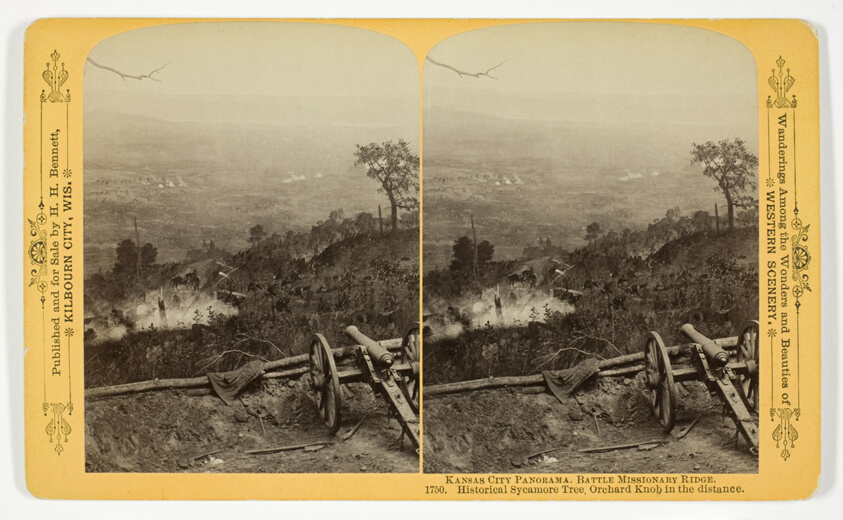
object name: Photograph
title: Historical Sycamore Tree, Orchard Knob in the distance, No. 1750 from the series "Kansas City Panorama. Battle Missionary Ridge"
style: 19th century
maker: Henry Hamilton Bennett (American, born Canada, 1843-1908)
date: 1889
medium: Albumen print, stereo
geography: Wisconsin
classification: photography; photograph; albumen silver print; stereograph (albumen)